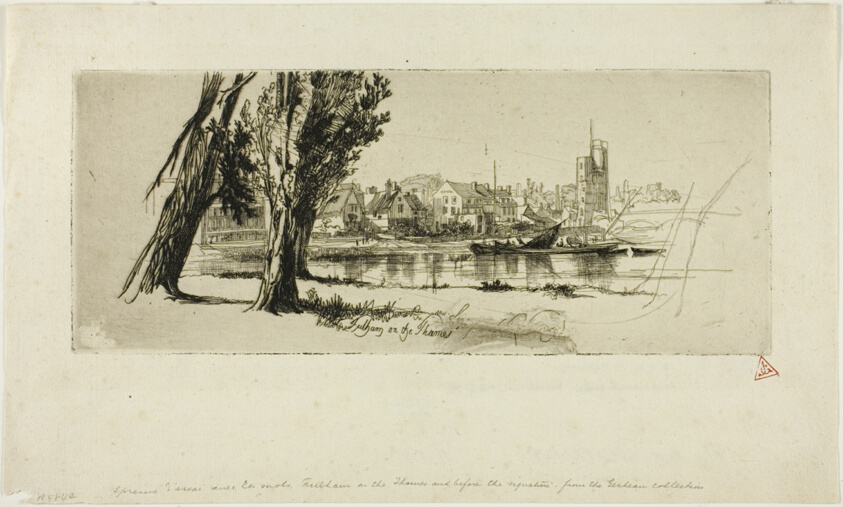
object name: Print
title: Fulham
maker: Francis Seymour Haden (English, 1818-1910)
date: c. 1859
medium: Etching and drypoint on ivory laid paper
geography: England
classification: etching; print; prints and drawing